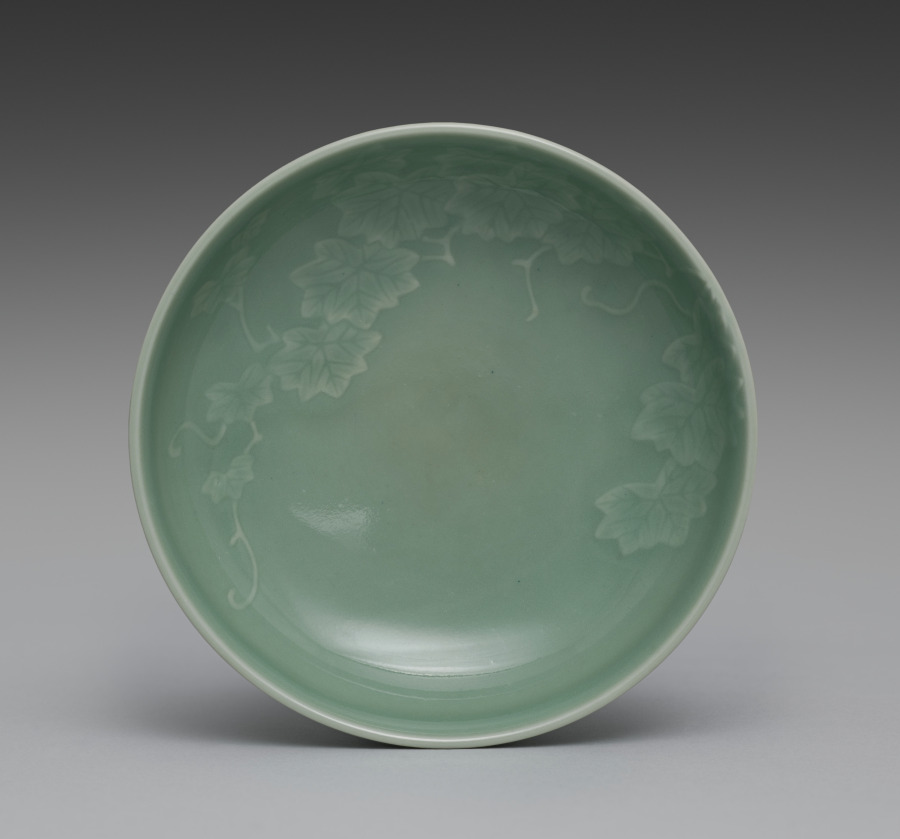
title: Dish from Dishes with Ivy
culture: Japan, Meiji period (1868–1912)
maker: Seifū Yohei III (Japanese, 1851–1914)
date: 1893–1914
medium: One from a set of five dishes; porcelain with green glaze and molded designs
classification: Ceramic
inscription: 清風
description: Yohei III’s main output for his sophisticated clientele was in the form of tea sets and dining sets. He often produced in pairs, sets of five, or sets of ten. This set of five dishes with a green glaze and designs of ivy vines in very low relief has unfortunately lost its box. These dishes are slightly larger than the other dishes, like CMA 2022.187, and so may have been not saucers but rather small plates for meals.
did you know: In his career, Seifū Yohei III created a range of dishes in green glazes.